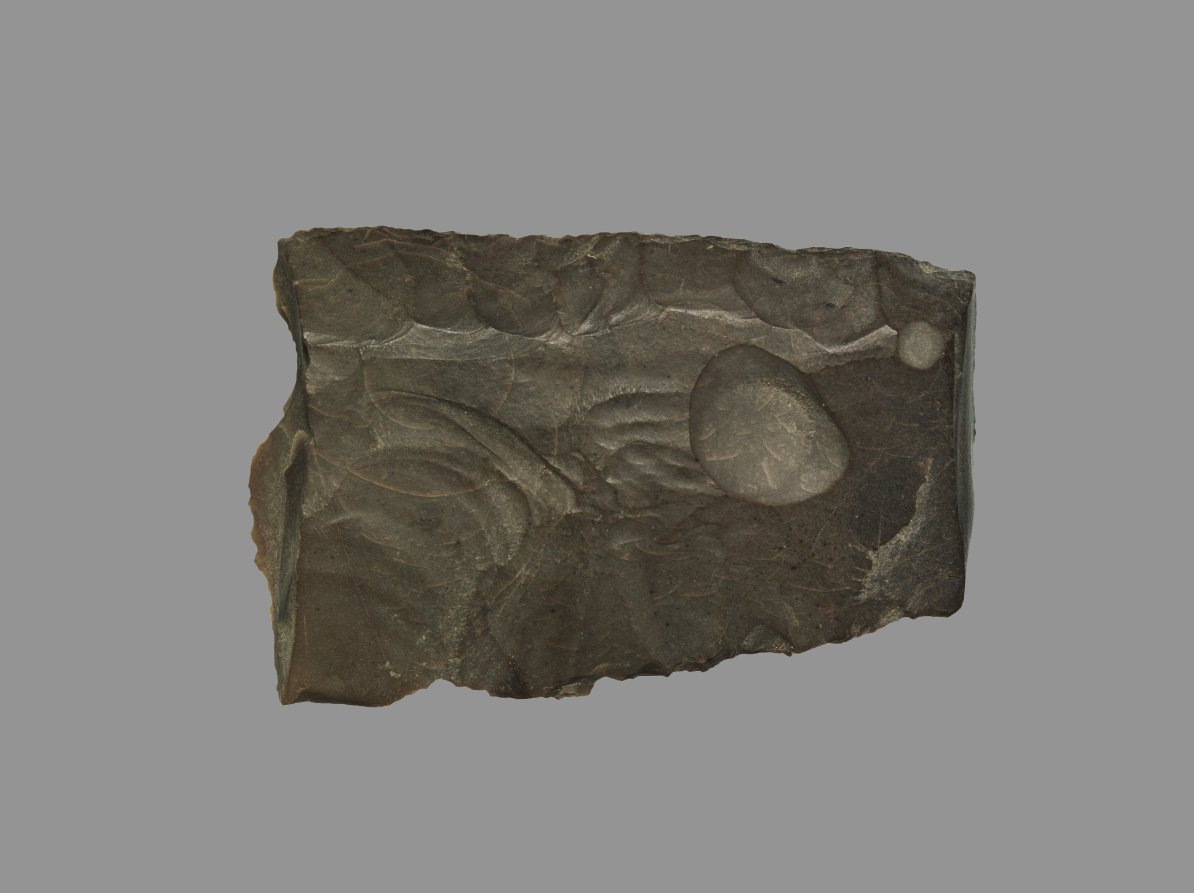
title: Sickle Blade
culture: Egypt, Middle Kingdom (2040–1648 BCE), Dynasty 12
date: 1980–1801 BCE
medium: flint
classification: Implements